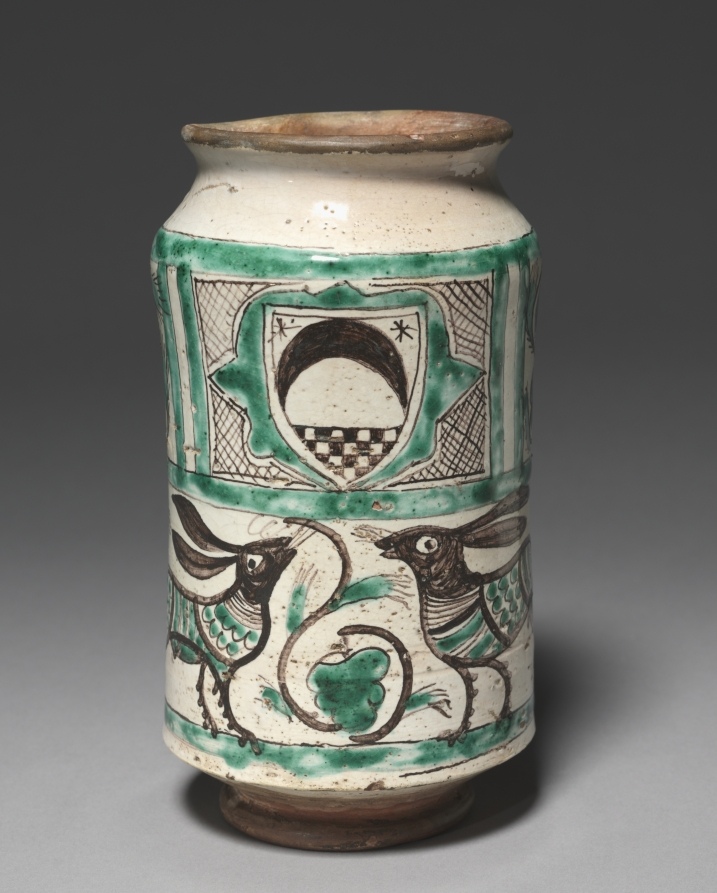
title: Albarello with Two Rabbits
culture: Spain, Paterna, 14th century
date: 1300s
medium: tin-glazed earthenware (maiolica)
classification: Ceramic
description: This albarello, a cylindrical jar used to store dry medicinal herbs, exemplifies the wares of Paterna, near Valencia. Its decoration is dominated by the crest of the Luna family, Lords of Paterna, under which two rabbits are shown nibbling on a grapevine. These vessels were commonly used in spice stores and hospital pharmacies.